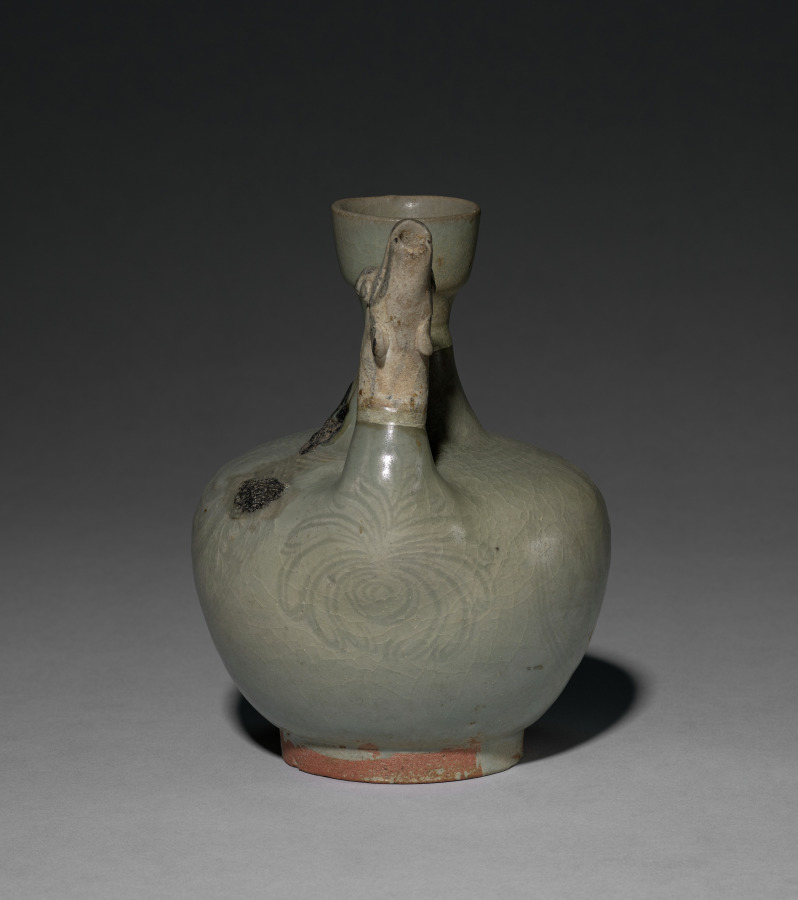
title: Pouring Vessel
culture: Siam, Sawankhalok ware, late 13th-14th Century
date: late 1200s-1300s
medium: stoneware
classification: Ceramic